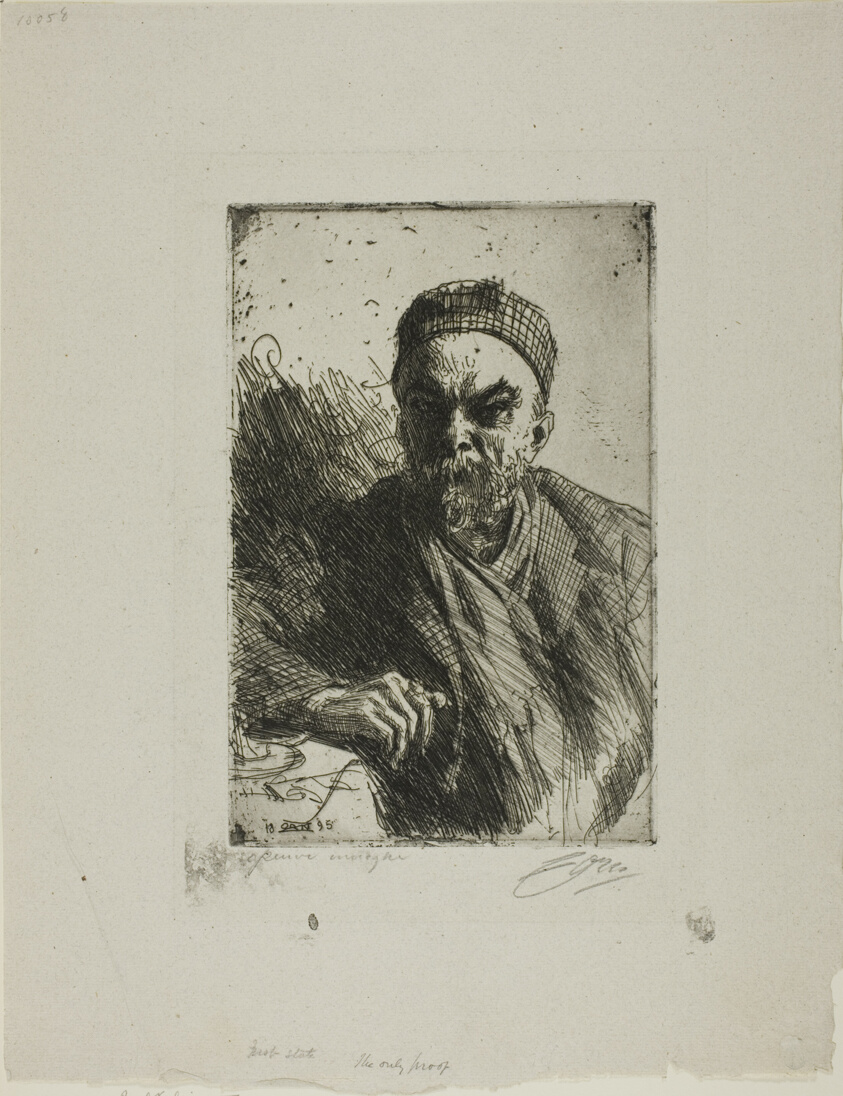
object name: Print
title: Paul Verlaine II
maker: Anders Zorn (Swedish, 1860-1920)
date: 1895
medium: Etching on off-white laid paper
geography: Sweden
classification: etching; print; prints and drawing